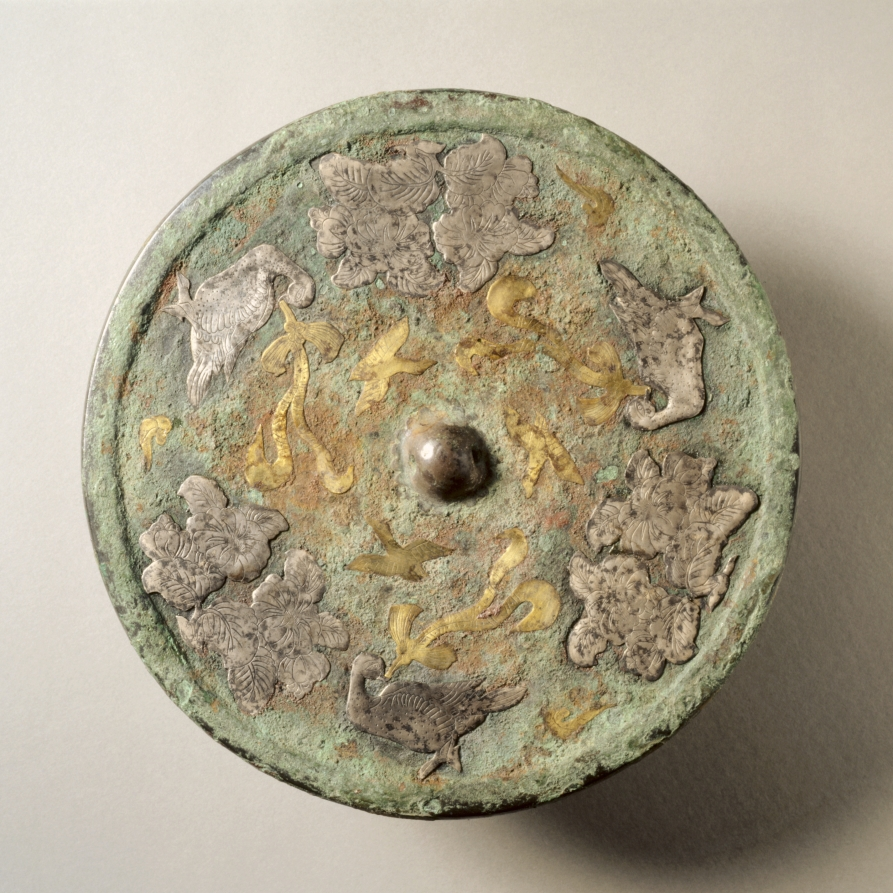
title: Mirror with Flowers and Birds in Gold and Silver Cutouts over a Lacquer Base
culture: China, Tang dynasty (618-907)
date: mid-700s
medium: bronze with gold and silver cutouts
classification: Metalwork